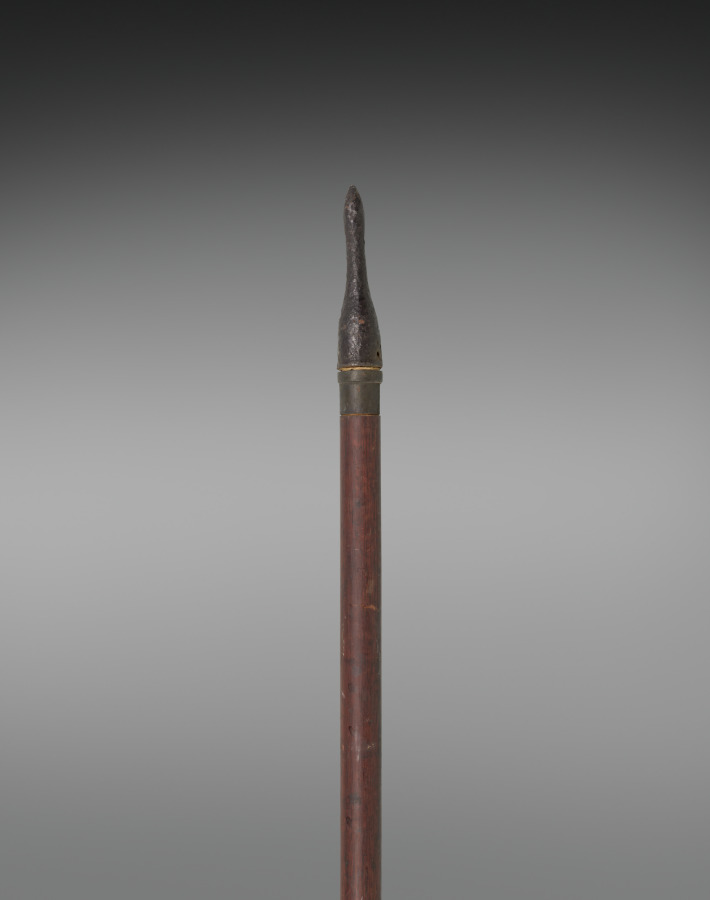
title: Spear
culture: Japan, Edo period (1615–1868)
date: 1700s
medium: wooden handle, metal blade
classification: Arms and Armor